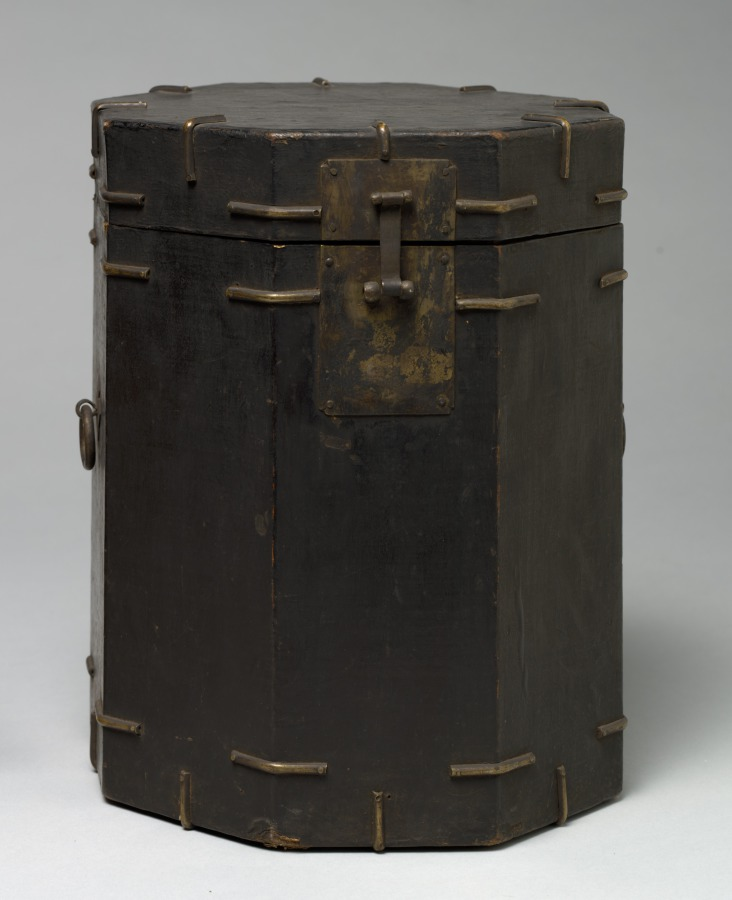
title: Crown Box for the Royal Ceremonial Costume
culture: Korea, Joseon dynasty (1392–1910)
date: late 1800s–early 1900s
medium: wood with metal hardware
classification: Wood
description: This is a set of royal ceremonial robe and accessories worn by a high-ranking court official for attending special state ceremonies. The set consists of an inner coat, an outer coat, a skirt, a back apron, a crown, a pair of jade tassels, a tablet, and a belt.